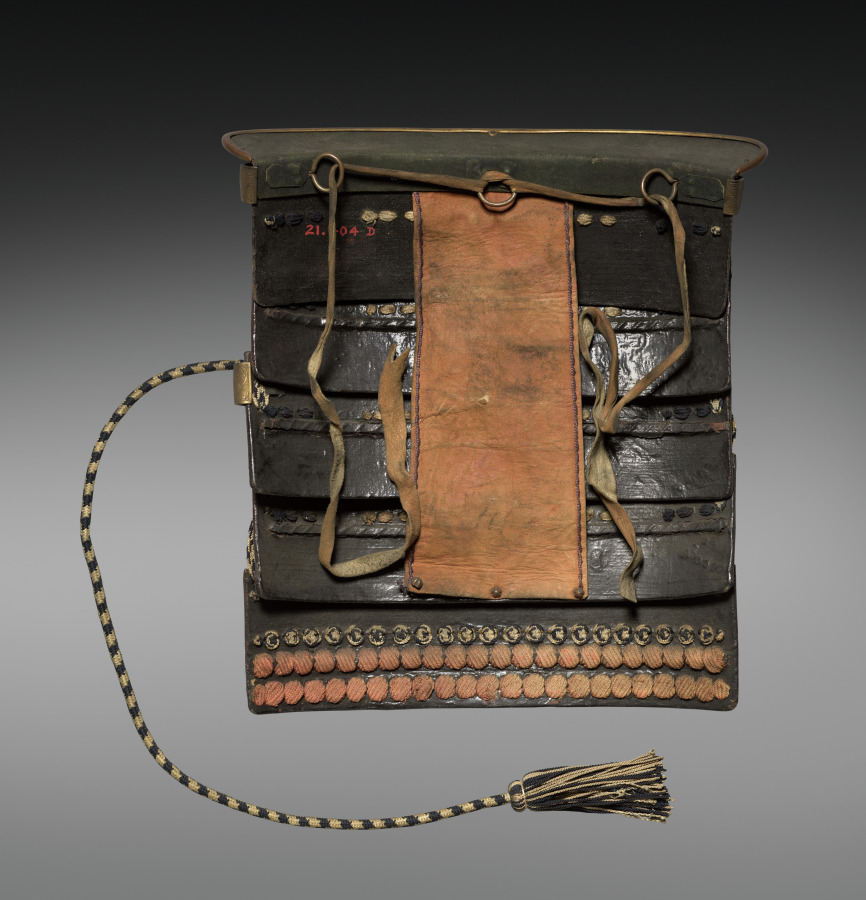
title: Shoulder Guard (Sode)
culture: Japan, Edo period (1615–1868)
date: 1600s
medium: Iron, lacquer, textile (silk)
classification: Arms and Armor